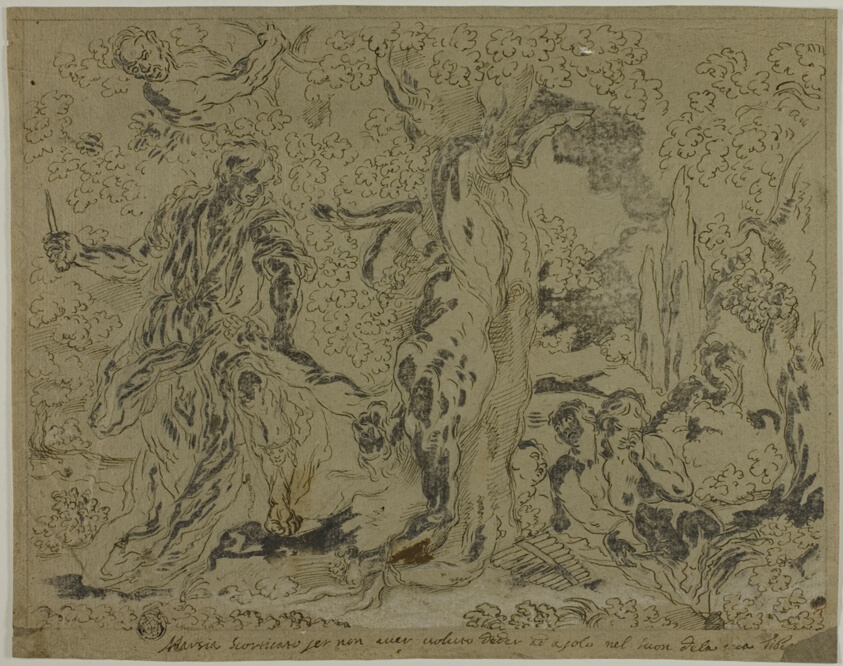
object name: Drawing and Watercolor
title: Appolo Skinning Marayas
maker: Unknown Artist; Italian, n.d.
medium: Pen and wash on paper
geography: Italy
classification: pen and ink drawings; drawings (visual works); prints and drawing